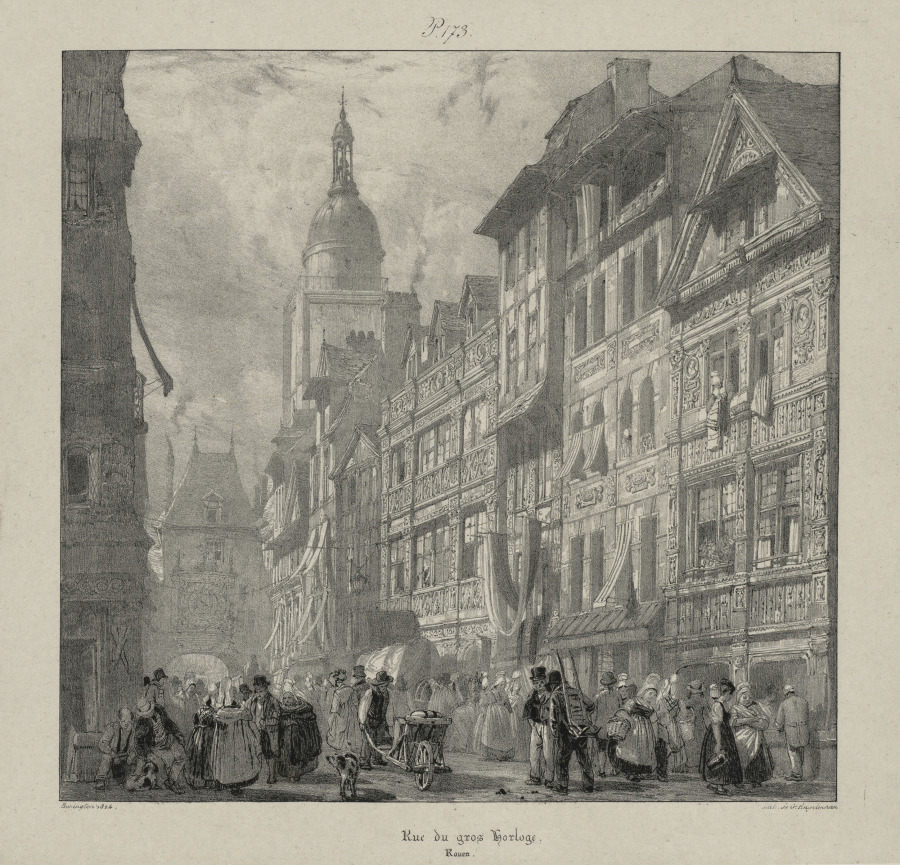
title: Voyages pittoresques et romantiques dans l'ancienne France, Normandie: Rue du Gros Horloge, Rouen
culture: England, 19th century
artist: Richard Parkes Bonington (British, 1802–1828)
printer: Godefroy Engelman (French, 1788–1839)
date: 1824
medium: lithograph on chine collé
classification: Print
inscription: In plate, upper margin, center: "P. 173"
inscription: in plate, below image, left: "Bonington 1824"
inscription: in plate, below image, right: "Lith. de G. Engelmann"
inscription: in plate, lower margin, center: "Rue du gros horloge/Rouen"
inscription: bottom right corner in graphite: "bi.21.11"